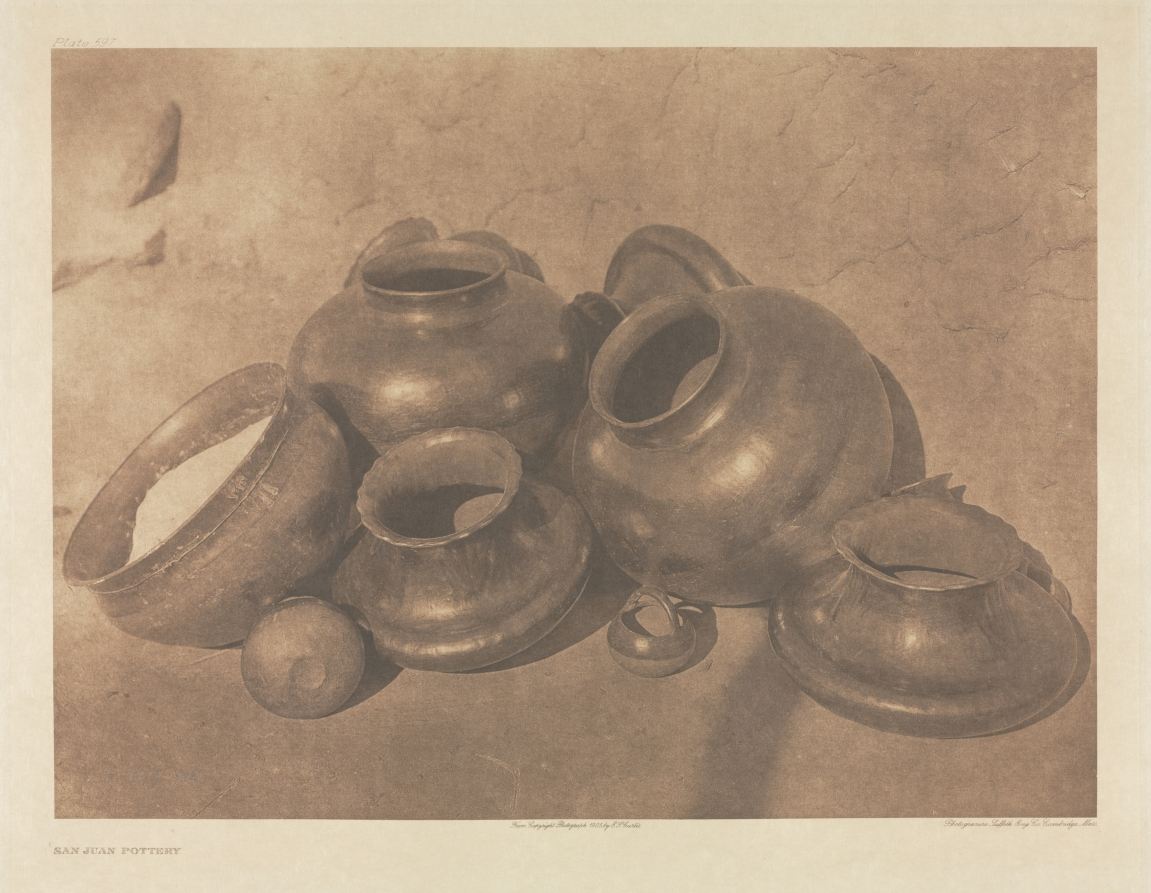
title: Portfolio XVII, Plate 597: San Juan Pottery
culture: America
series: The North American Indian: being a series of Portfolios picturing and describing the Indians of the United States, the Dominion of Canada, and Alaska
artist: Edward S. Curtis (American, 1868–1952)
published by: The University Press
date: 1905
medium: photogravure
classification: Portfolio